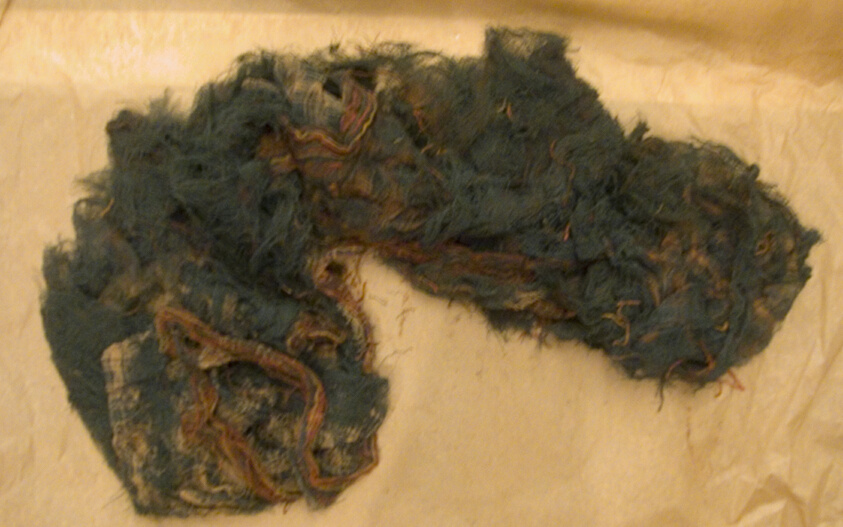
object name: Textile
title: Fragment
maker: Peru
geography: Peru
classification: textile; weaving